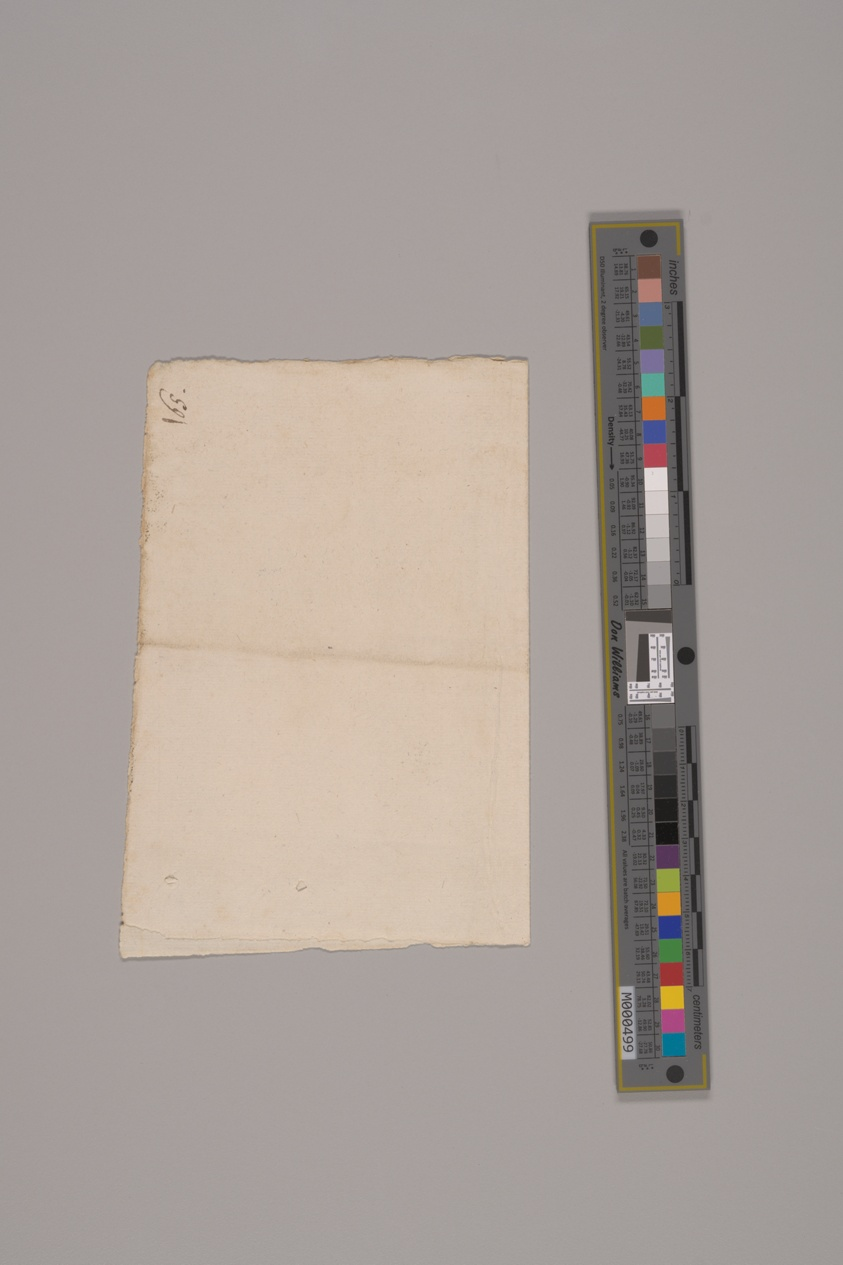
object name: Print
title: Sight, from The Five Senses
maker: Raphael Sadeler I (Flemish, 1560/61–1628/32); after Maarten de Vos (Flemish, 1532–1603)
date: 1581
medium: Engraving on paper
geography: Flanders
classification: engraving; paper; print; prints and drawing